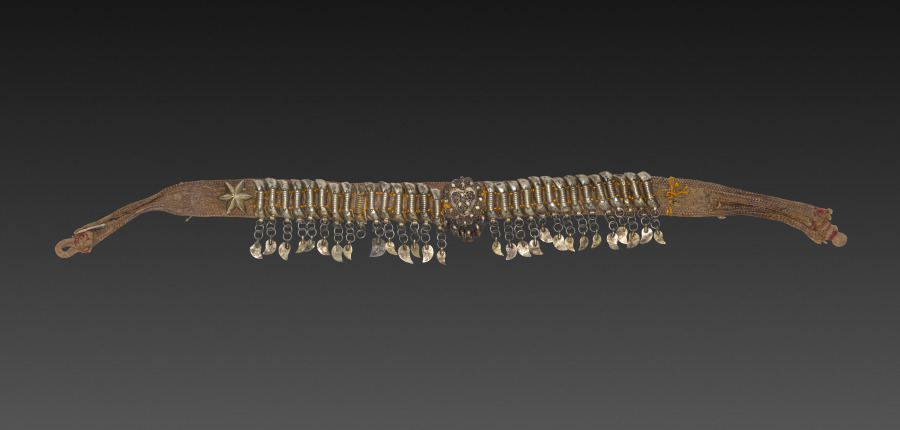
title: Armlet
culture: Silesia, 19th century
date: 1800s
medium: silver gilt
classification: Jewelry